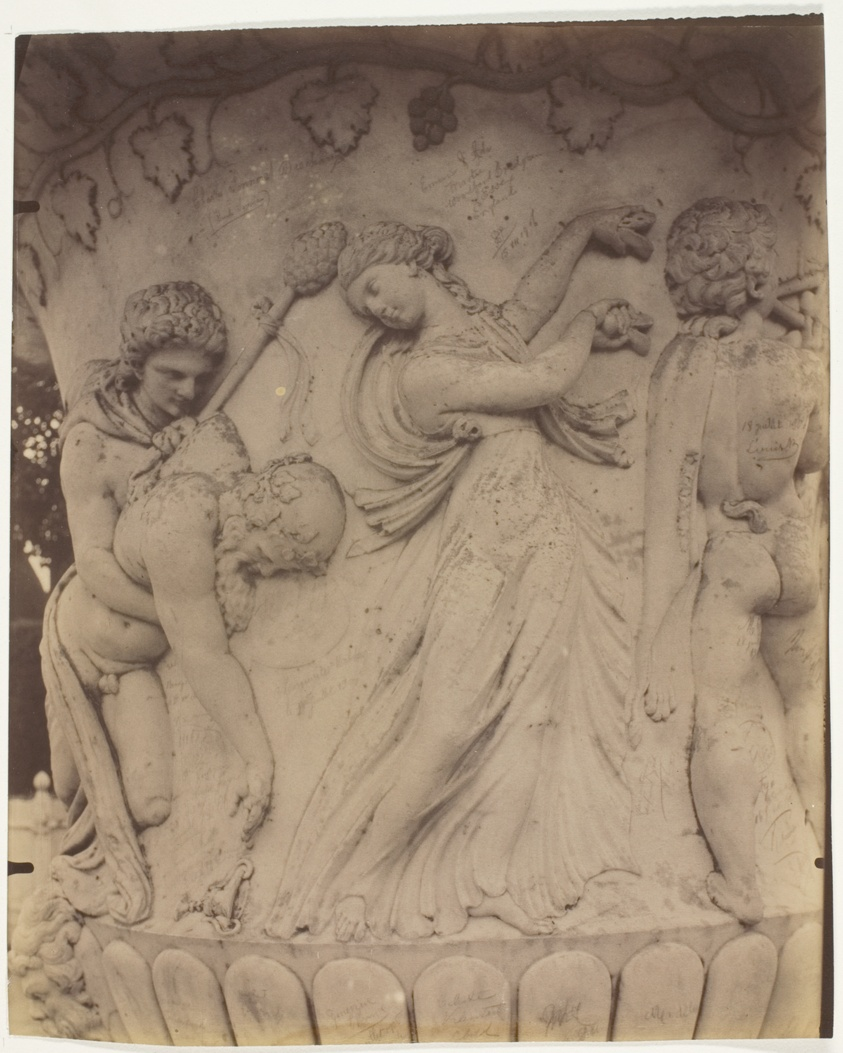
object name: Photograph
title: Versailles, Vase, (Detail)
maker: Jean-Eugène-Auguste Atget (French, 1857–1927)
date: 1906/07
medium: Albumen print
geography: France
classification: albumen silver print; photographic process; photography; photograph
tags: Collected by Hugh Edwards